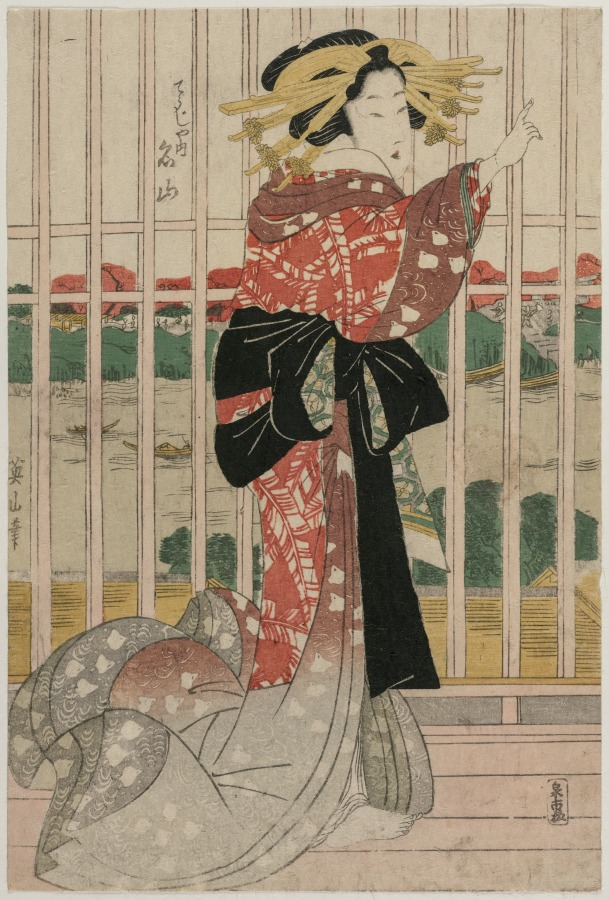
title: The Courtesan Meizan of the Chojiya on a Balcony Overlooking the Sumida River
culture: Japan, Edo period (1615–1868)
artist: Kikukawa Eizan (Japanese, 1787–1867)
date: ca. early or mid 1820s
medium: color woodblock print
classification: Print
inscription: Signature: Eizan hitsu